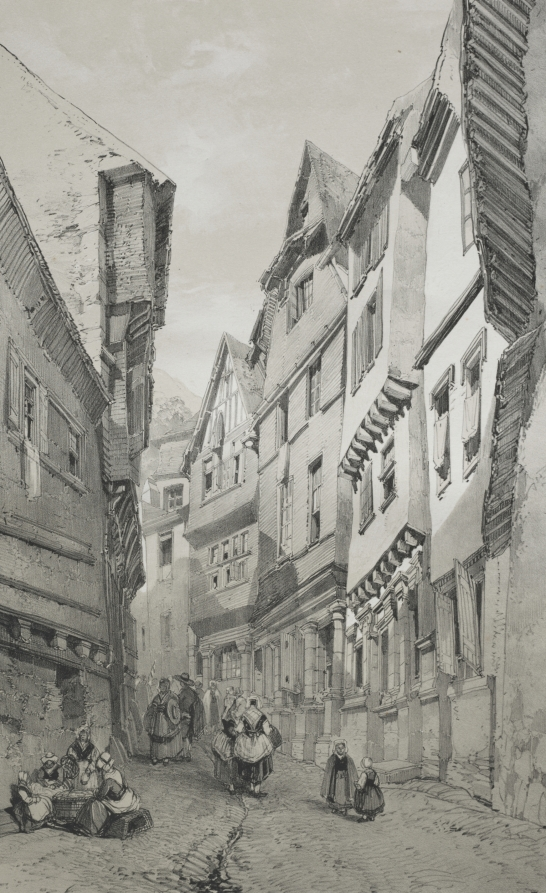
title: Voyages pittoresques et romantiques dans l'ancienne France. Bretagne: Morlaix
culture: France, 19th century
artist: Eugène Cicéri (French, 1813–1890)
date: c. 1845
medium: lithograph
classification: Print